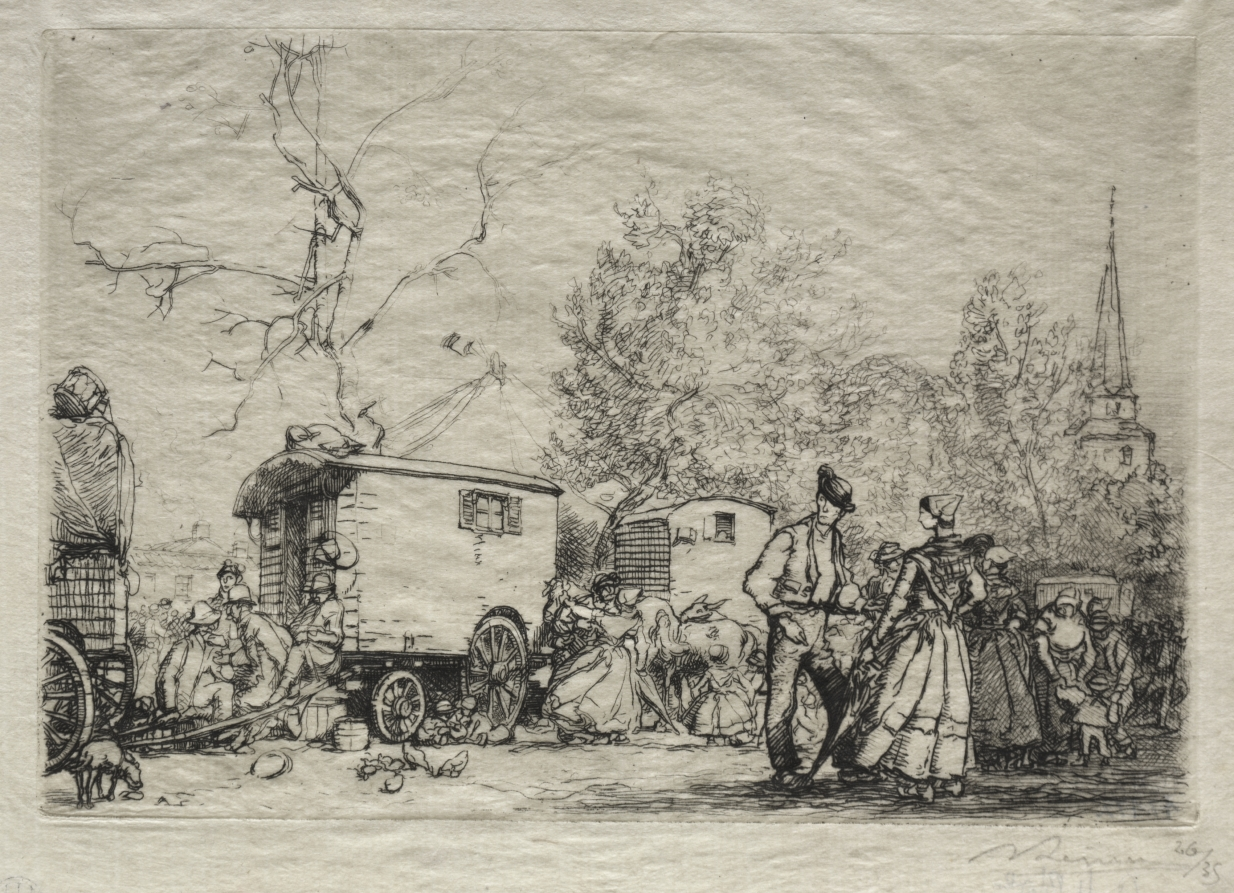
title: At the Fair St. Jean de Mont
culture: France, early 20th Century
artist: Auguste Louis Lepère (French, 1849–1918)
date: 1906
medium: etching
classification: Print